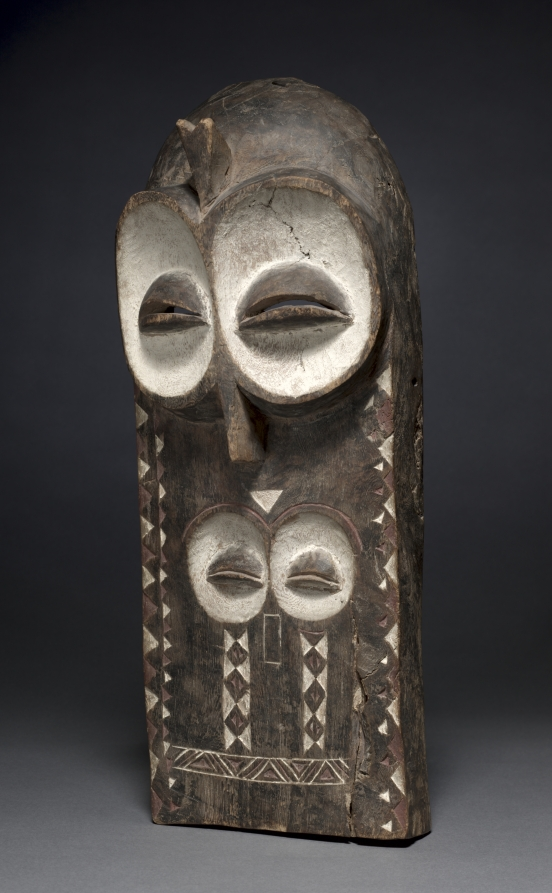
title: Mask (Emangungu)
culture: Africa, Central Africa, Democratic Republic of Congo, Bembe-style maker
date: possibly early 1900s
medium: Wood, kaolin, colorant, and iron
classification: Mask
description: Among the Bembe, anthropo-zoomorphic plank masks are used in circumcision rites called butende. They are worn along with a costume of bark and banana leaves by the initiated boys who beg for food in the village while living in seclusion in the forest. The sculpture’s short projections above the forehead are identified as an owl’s tufts. The two pairs of eyes could refer to divination.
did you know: White kaolin clay highlights the eyes of this carved wooden mask.